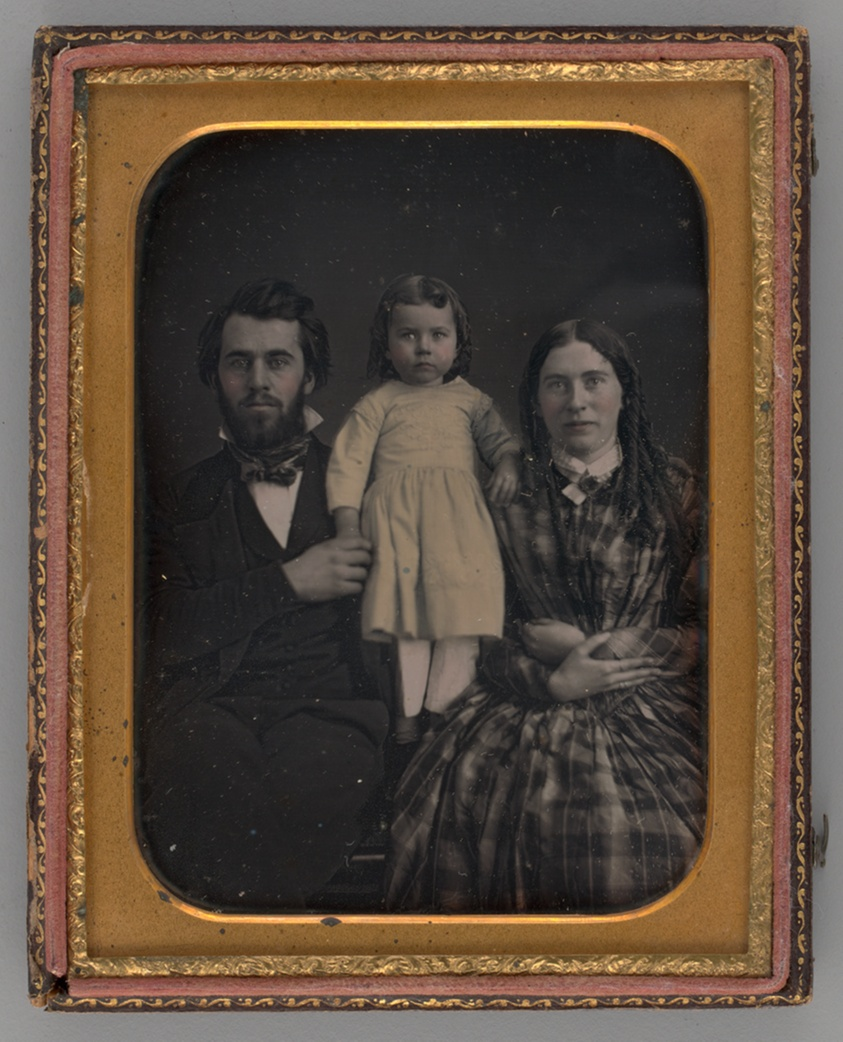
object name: Photograph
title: Untitled (Portrait of a Man, Woman and Girl)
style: 19th century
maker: Unknown maker; American, 19th century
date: 1856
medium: Daguerreotype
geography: United States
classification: portrait; photograph; photographic process; photography; portrait; daguerreotype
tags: lundberg collection, portraits: multiple subjects, family, families, couples, babies, portraits, portraits: child subject